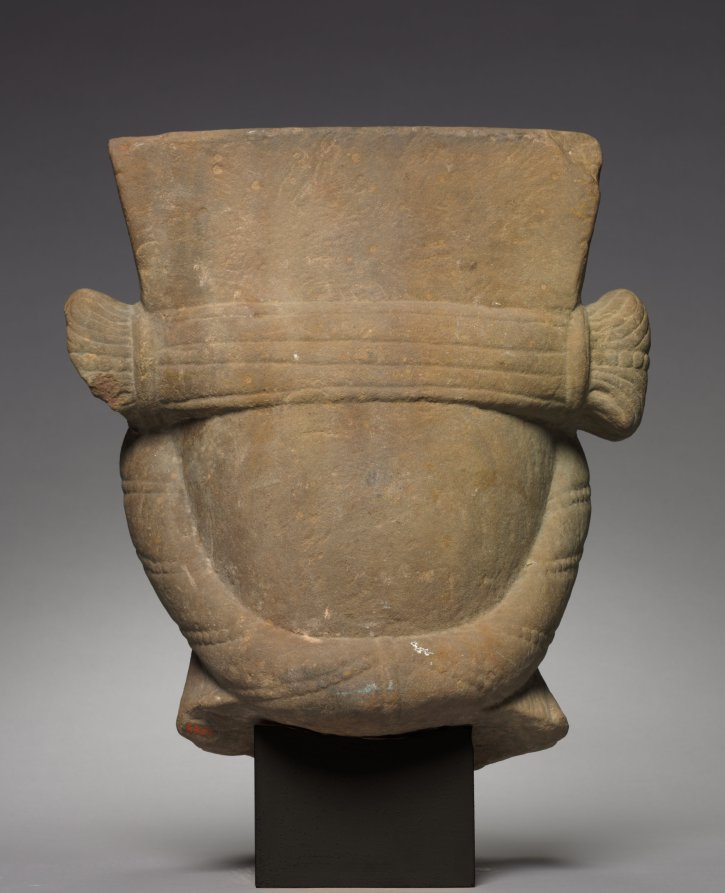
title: Head of Vishnu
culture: Central India, Madhya Pradesh, Vidisha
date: 300s CE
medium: sandstone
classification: Sculpture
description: When complete, this iconic image of the Hindu god Vishnu would have been impressive in scale, approximately life-size. During the Gupta period (c. 319–550 CE), images of Vishnu included a lion head in the center of the crown. The lion communicated royal authority, solar radiance, and the concept of glory. These attributes characterize the power and personality of this deity who ensures the preservation of his creation.